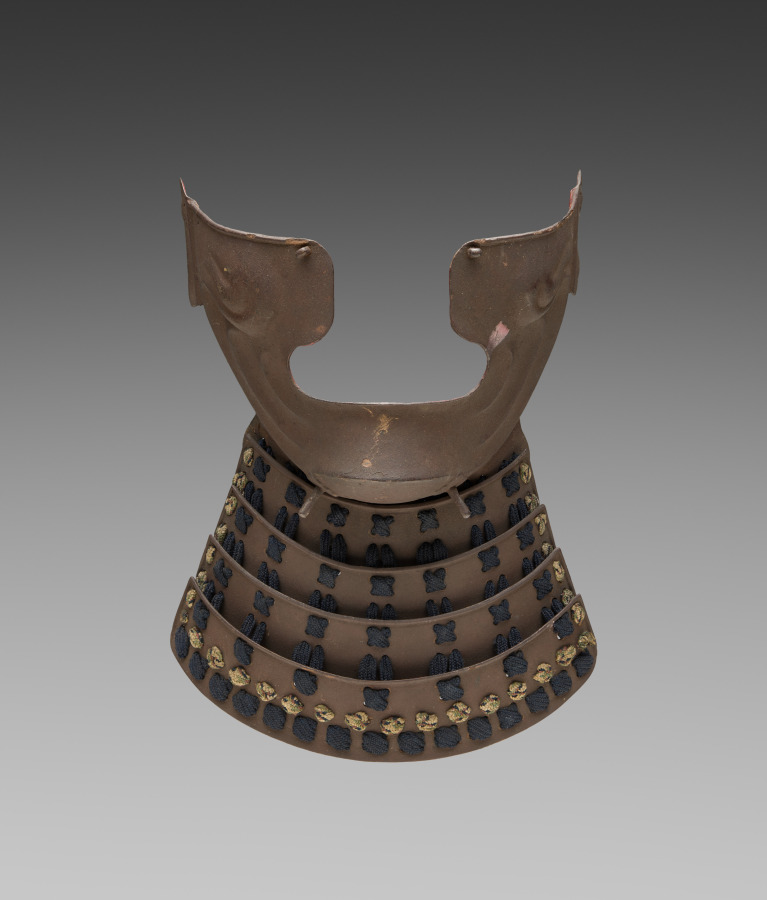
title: Half-mask (Ho'o-ate) with Neck Guard (Nodowa)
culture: Japan, Edo period (1615–1868)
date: 1615–1868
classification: Arms and Armor